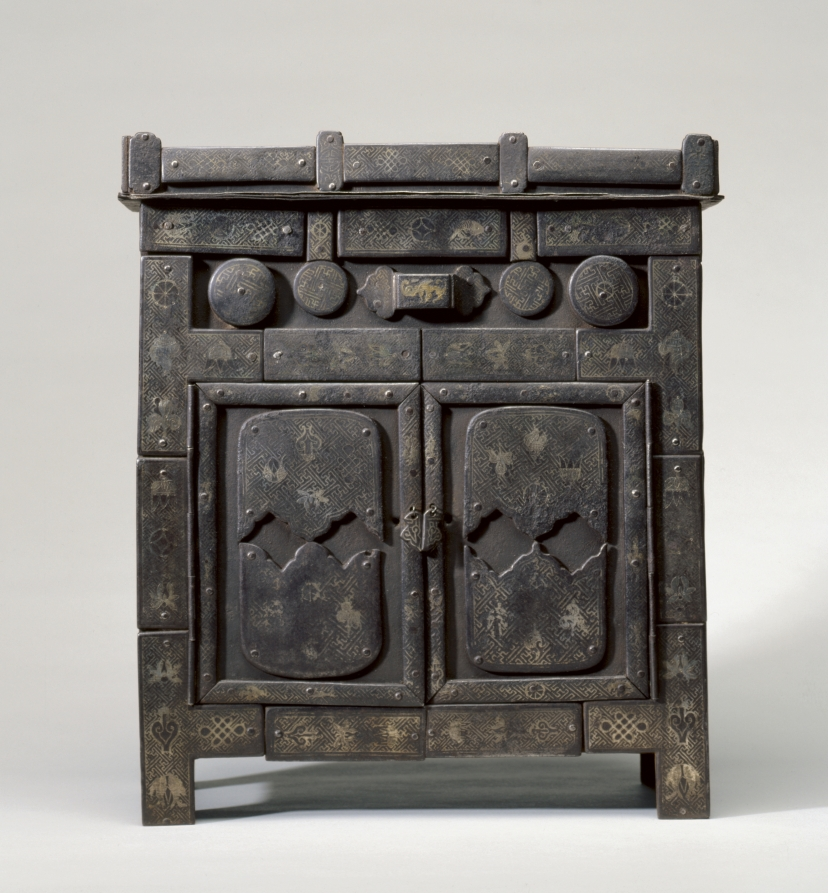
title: Spirit House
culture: Korea, Joseon dynasty (1392–1910)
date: late 1800s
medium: iron inlaid with silver and copper decoration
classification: Metalwork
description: Many homes in premodern Korean society had a memorial shrine for preparing and holding ancestral rites. Placed on the top of a tall chair, this miniature edifice (called the spirit house) served as a temporary residence for visiting ancestral spirits. On the table, a variety of delicacies such as fruits, rice, meat, and wine would be placed to treat those spiritual guests.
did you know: The belief in two types of souls, the spiritual and the corporeal, embodied the core concept of ancestor worship in traditional China and Korea. While the corporeal soul is believed to reside in the tomb, the spiritual soul, in the spirit house, like this example, guards his or her decedents.